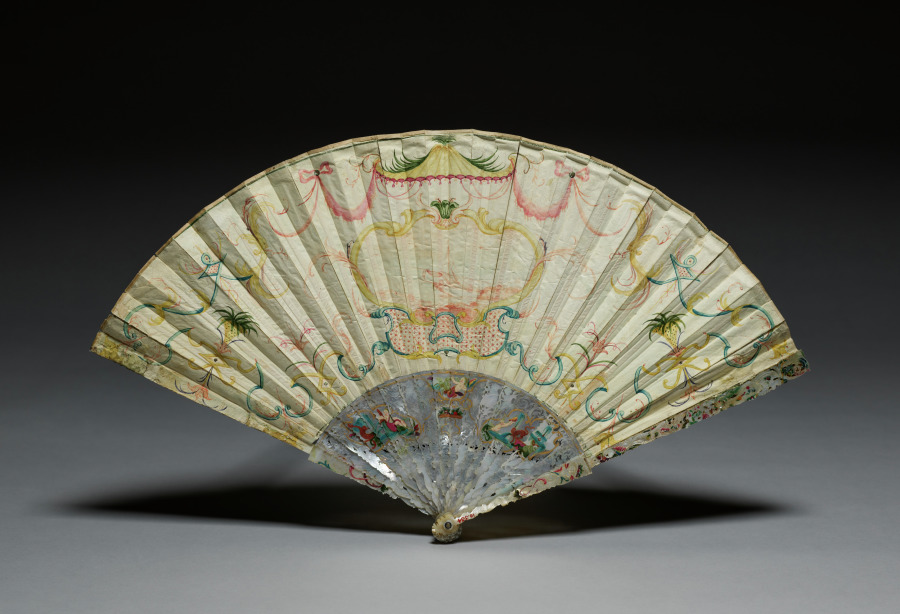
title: Folding Fan: Departure of Aurora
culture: Italy, Naples (?), 18th century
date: c. 1750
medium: leaf: gouache on skin; frame: mother-of-pearl and wood with painted decoration in relief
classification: Miscellaneous